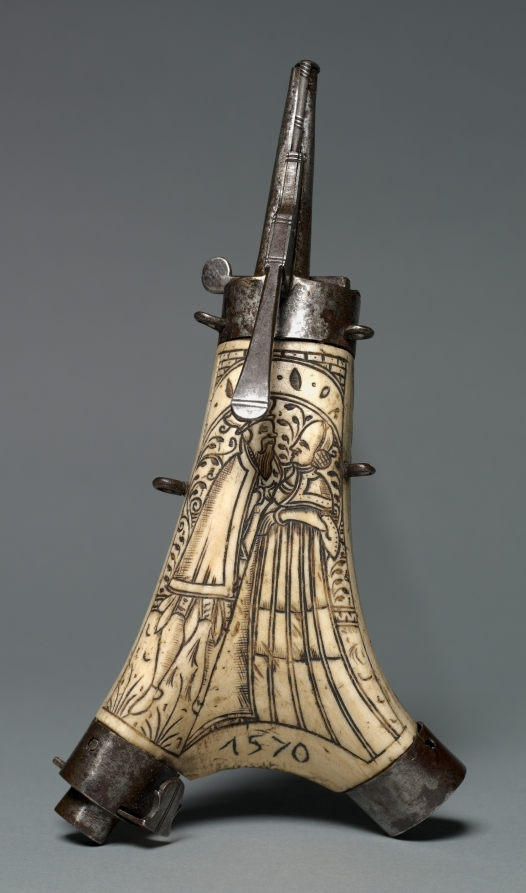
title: Powder Flask with Standing figures of a Man and Woman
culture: Germany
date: 1570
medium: elk horn, steel mounts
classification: Arms and Armor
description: Powder flasks are small, portable containers designed to hold gunpowder. From the 1400s to the 1800s, powder flasks were indispensable for charging and priming firearms of all types. Without powder flasks firearms were of little use to their owners. Many highly decorated flasks rank as works of art. During the 1500s, they were frequently decorated with images of famous historical figures.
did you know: The year 1570 can be seen below the standing male and female who may represent the original owners.